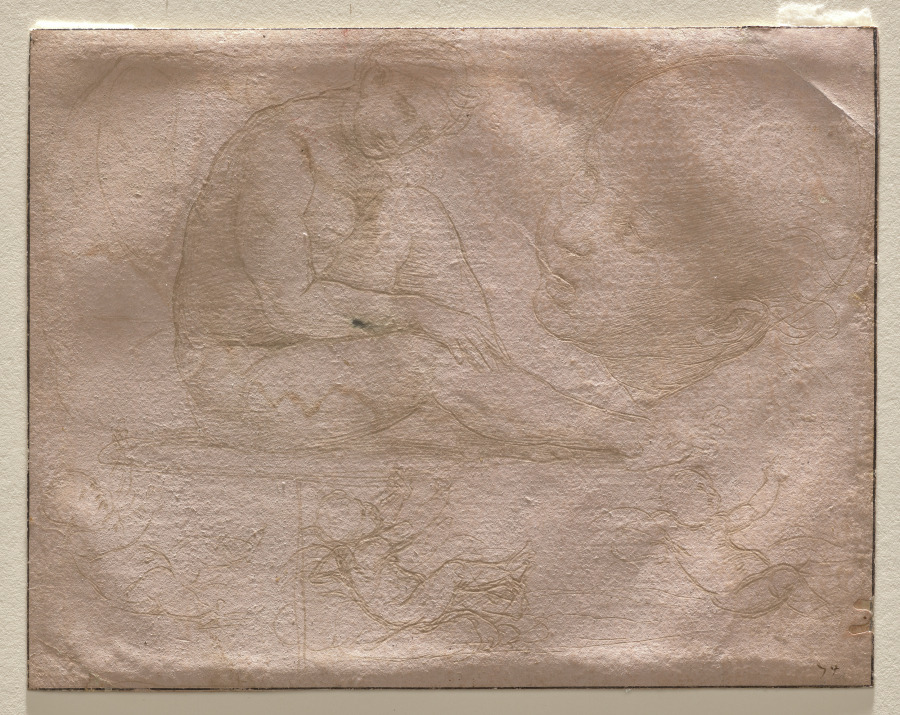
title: Studies of a Seated Female, Child's Head, and Three Studies of a Baby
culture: Italy, 16th century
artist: Raphael (Italian, 1483–1520)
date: c. 1507–8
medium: metalpoint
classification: Drawing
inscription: lower right, in brown ink: 74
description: This drawing is from Raphael’s "pink sketchbook," comprised of ten sheets of roughly equal size that each portray variations of a mother and child. Today, six of the drawings at the Palais des Beaux-Arts, Lille; two are at the British Museum; one is in a private collection; and one is in Cleveland. The small format of the sheets would have enabled the artist to carry the notebook as he traveled from Florence to Rome in 1508. Raphael used metalpoint, a technique popular in 15th- and early 16th-century Italy on a pink prepared surface. The pose of the infant's head in the drawing was based on that of the Christ child in Leonardo da Vinci's Benois Madonna, then in a private collection in Florence, with changes—such as the uplifted eyes and open mouth—made by Raphael. The curving back of the female nude is echoed in the roundness of the child's head. The three sketches of a reclining infant at the bottom of the sheet are freely handled and improvisational, relaying the child's squirming, continuous movement with repeated contour lines.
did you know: This sheet was probably once part of a sketchbook carried by the artist Raphael on a 1508 journey between Florence and Rome.